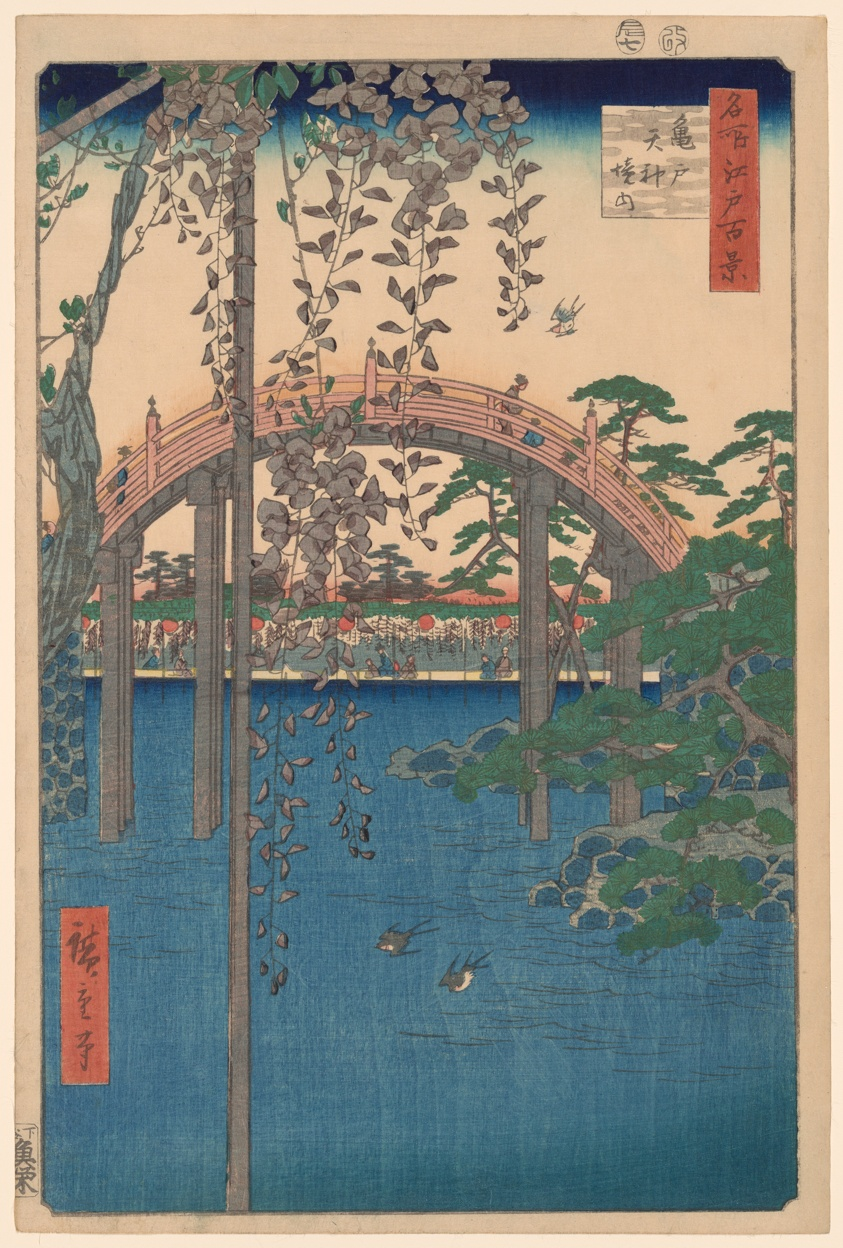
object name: Print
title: Precincts of Kameido Tenjin Shrine (Kameido Tenjin keidai), from the series "One Hundred Famous Views of Edo (Meisho Edo hyakkei)"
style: Japanese (culture or style)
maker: Utagawa Hiroshige 歌川 広重; Japanese, 1797-1858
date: 1856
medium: Color woodblock print; oban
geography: Japan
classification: woodblock print; print; asian art